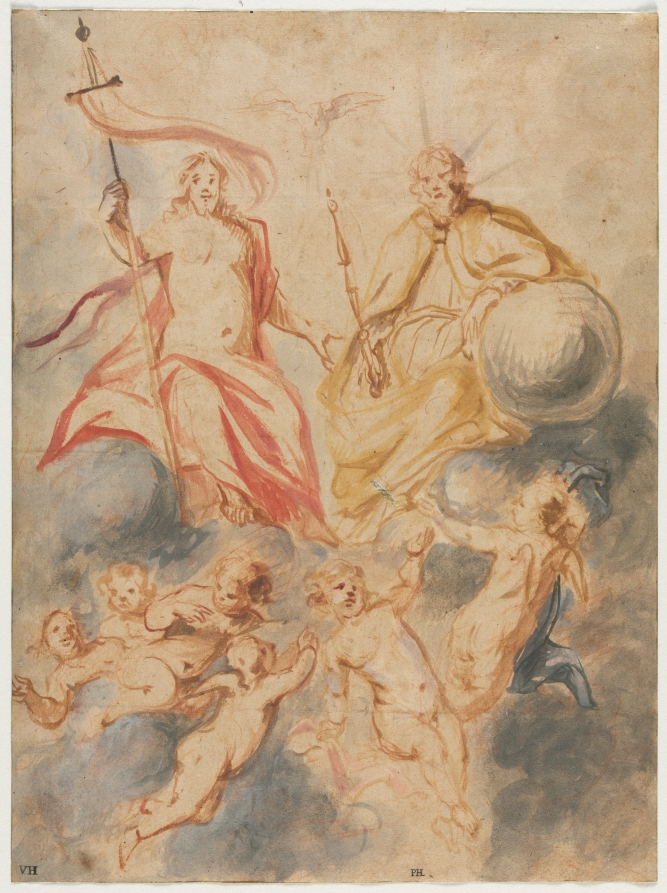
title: Holy Trinity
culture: Flanders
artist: Theodor van Thulden (Flemish, 1606–1669)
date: c. 1647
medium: watercolor and gouache over red chalk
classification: Drawing